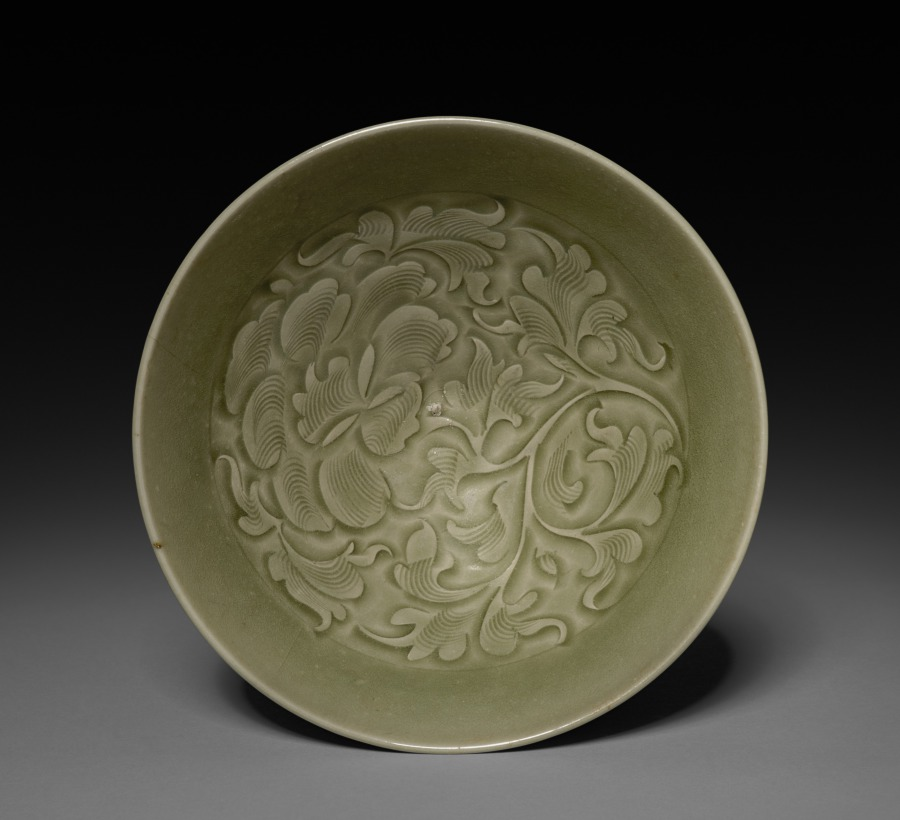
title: Bowl: Northern Celadon Ware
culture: China, Shaanxi or Henan province, Northern Song dynasty (960-1127)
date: 12th Century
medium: glazed stoneware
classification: Ceramic